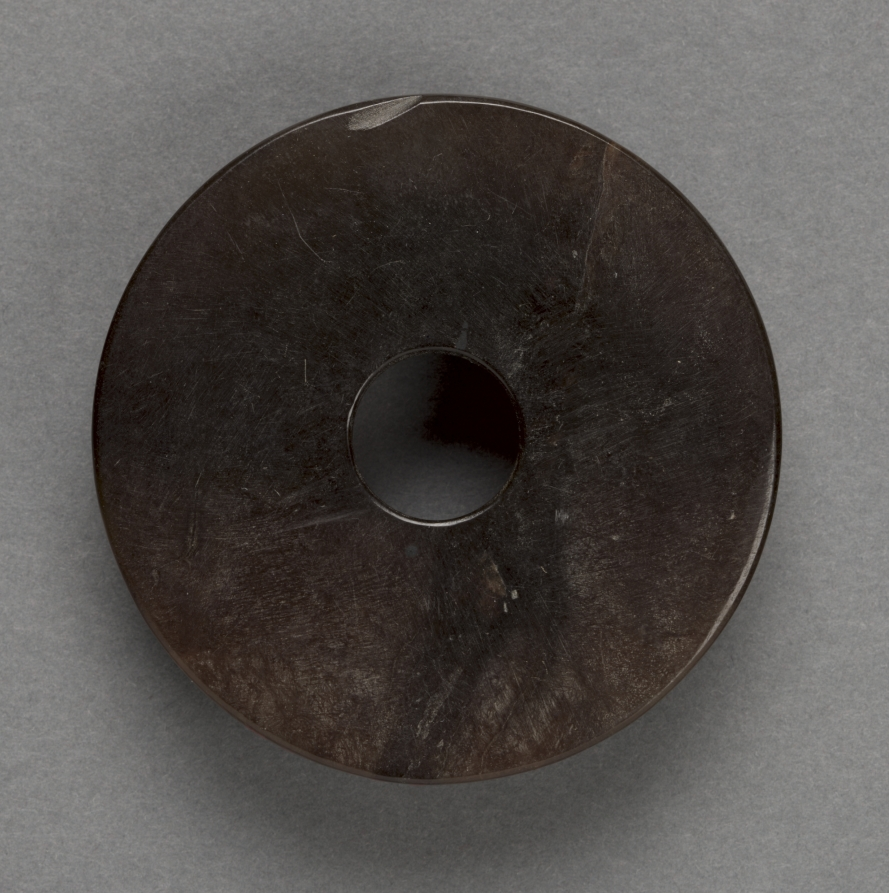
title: Pi (Ornament)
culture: China, Han dynasty (202 BCE–220 CE) or earlier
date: 206 BCE–220 CE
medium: jade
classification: Jade